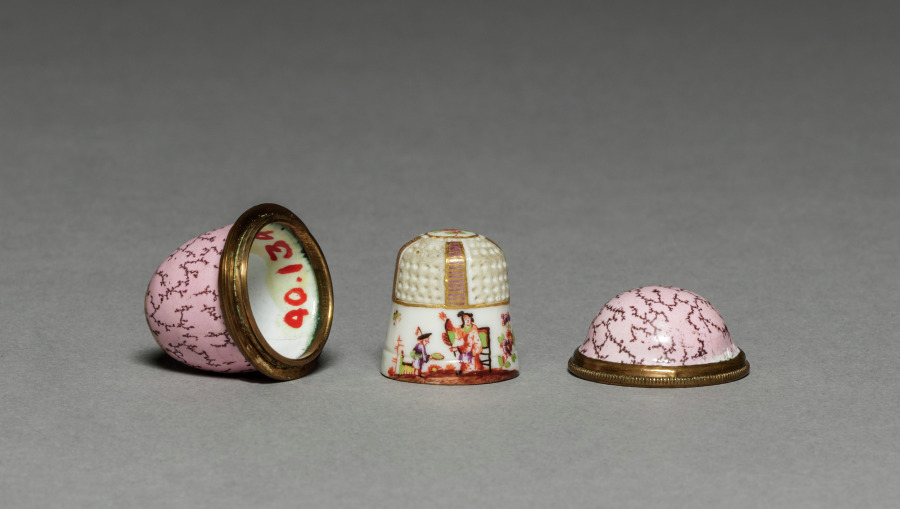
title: Thimble and Container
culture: England, mid-18th century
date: mid-18th century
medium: enamel on metal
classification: Enamel